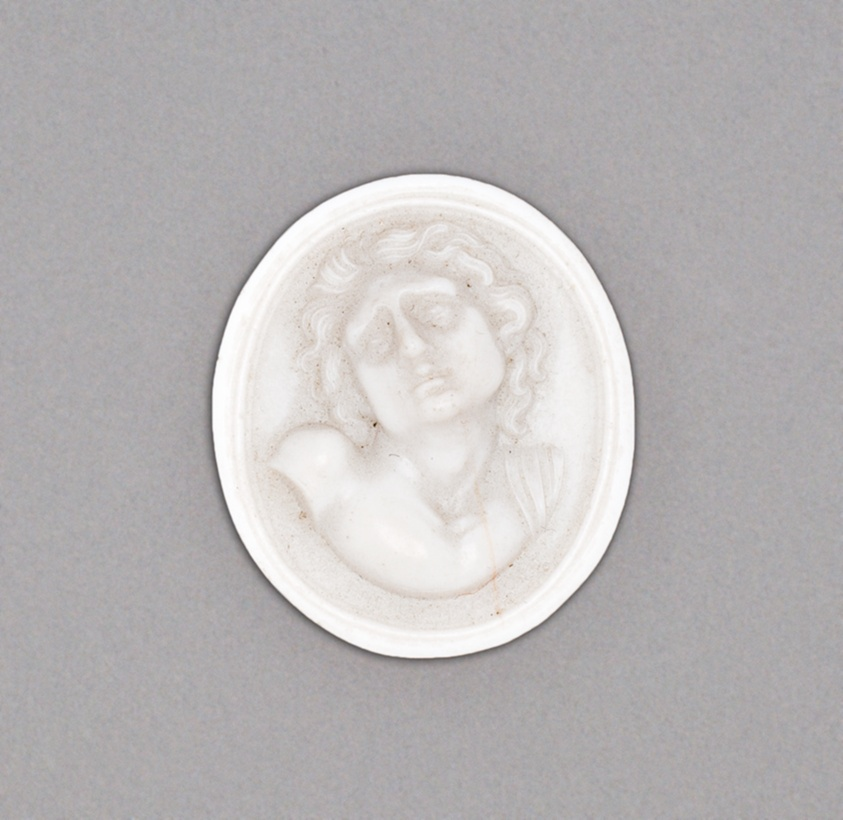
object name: Ceramics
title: Cameo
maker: James Tassie (Scottish, 1735-1799)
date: Late 18th century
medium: Stoneware (jasperware)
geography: Scotland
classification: cameo (sculpture); sculpture; stoneware; european decorative arts; ceramics